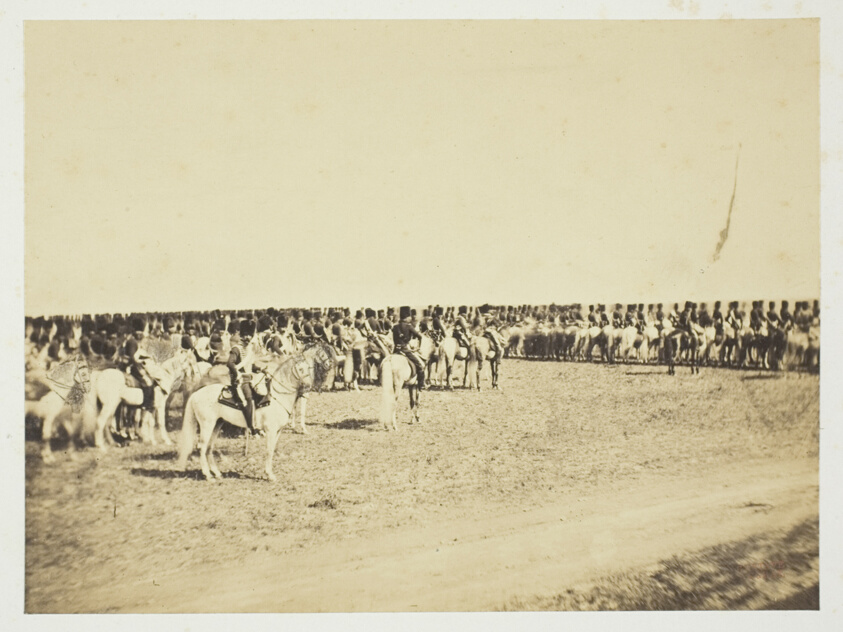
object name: Photograph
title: Untitled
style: 19th century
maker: Gustave Le Gray (French, 1820–1884)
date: 1857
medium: Albumen print, from the album "Souvenirs du Camp de Châlons"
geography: France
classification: albumen silver print; photographic process; photography; photograph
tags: Paris